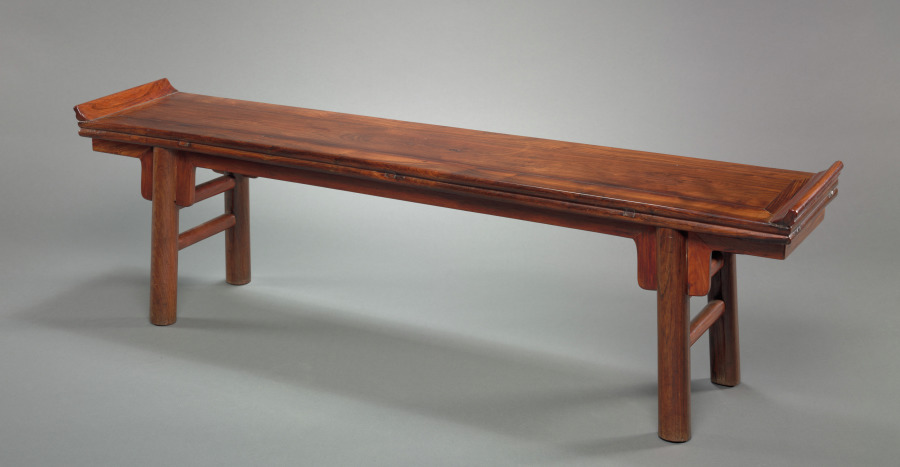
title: Low Table (Anji)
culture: China, Ming dynasty (1368–1644)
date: 1500s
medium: rosewood (huanghuali)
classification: Furniture and woodwork